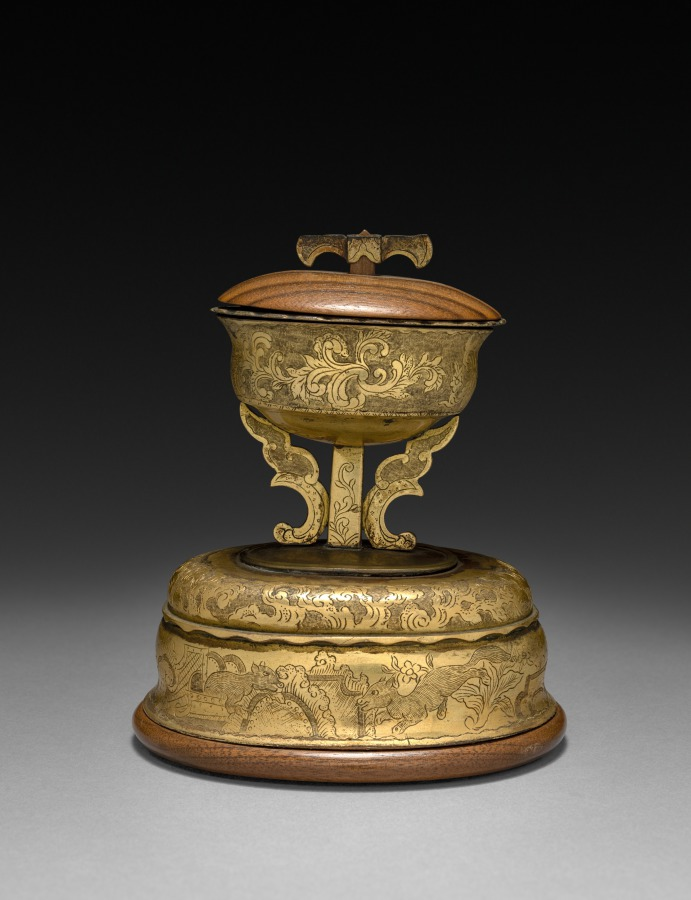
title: Incense Burner (?)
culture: Japan, Kamakura period (1185–1333)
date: 1185–1333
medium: gilt bronze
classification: Metalwork